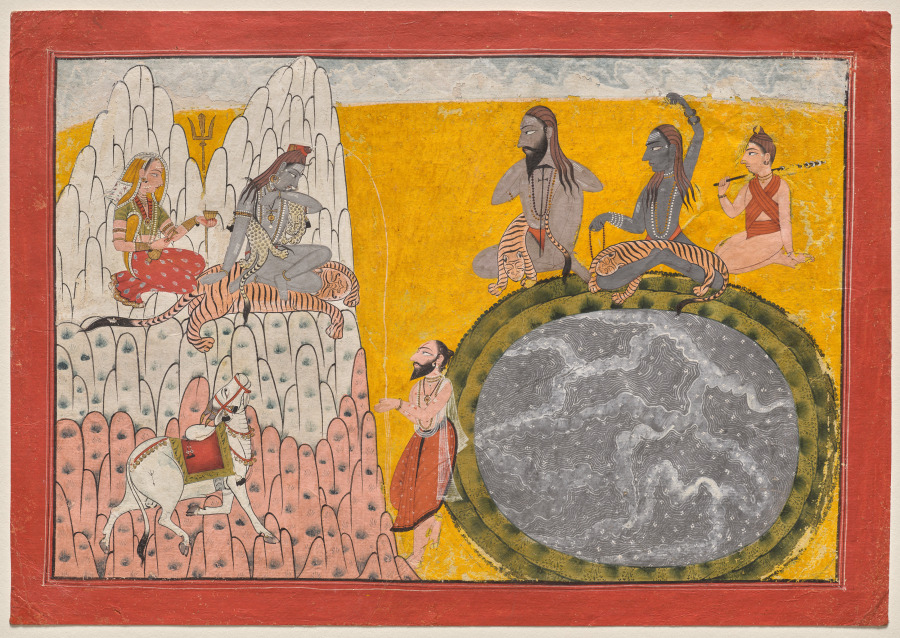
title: Descent of the Ganges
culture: Northern India, Pahari kingdoms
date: c. 1700–1710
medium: Gum tempera and gold on paper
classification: Painting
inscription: no. 10. 5451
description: In the upper left, Shiva sits with his wife Parvati on Mount Kailash in the Himalayas. She offers him a cup of wine, but Shiva looks down intently at the holy man Bhagiratha. He has stood on one leg for 1,001 years to obtain the gift of the Ganges River, which flows from Shiva’s topknot of hair. A dedicated devotee can divert the god’s attention, even from his beautiful wife and a cup of wine. By Mount Kailash is the icy Lake Manasarowar, still a major pilgrimage place for followers of Shiva. Hoping to earn the god’s favor, devoted practitioners perform acts of rigorous physical discipline.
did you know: Shiva and the other sages rest on tiger hides.